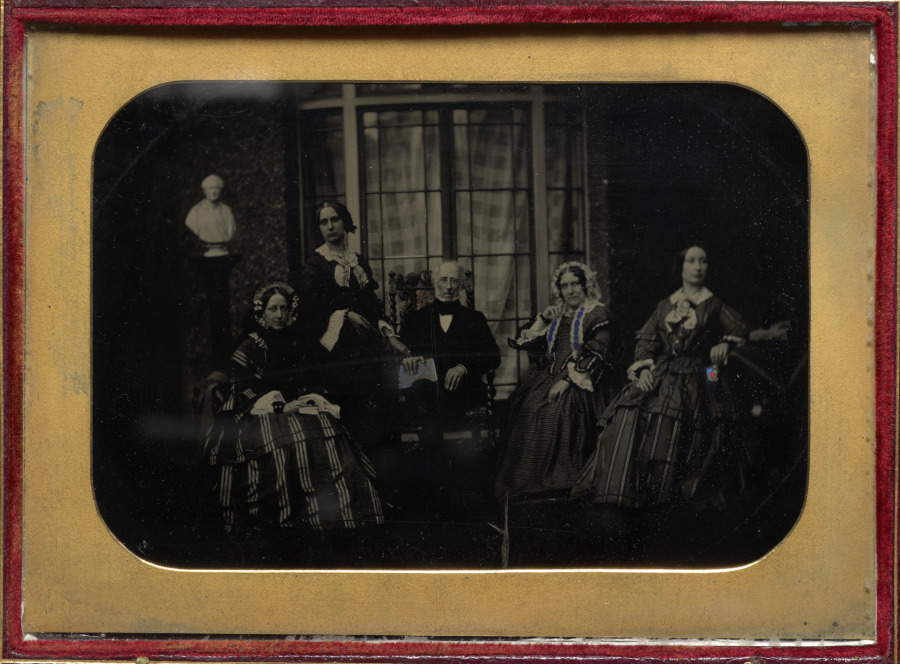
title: English family of five with marble bust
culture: England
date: 1850–65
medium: ambrotype, half plate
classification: Photograph